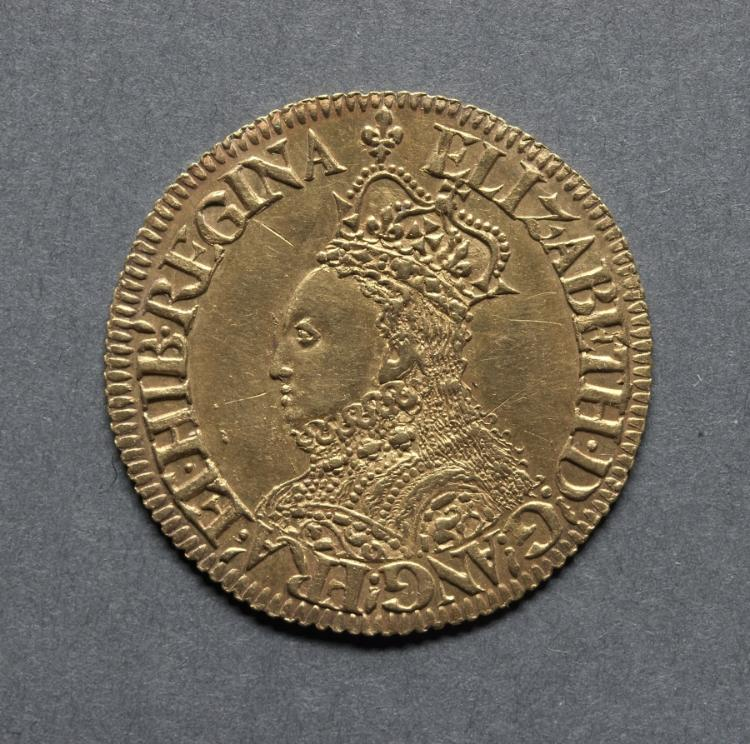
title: Half Pound: Elizabeth I (obverse)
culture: England, Elizabeth I, 1558-1603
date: 1558–1560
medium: gold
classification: Coins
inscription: ELIZABETH • D : G : ANG : FRA : ET • HIB : REGINA